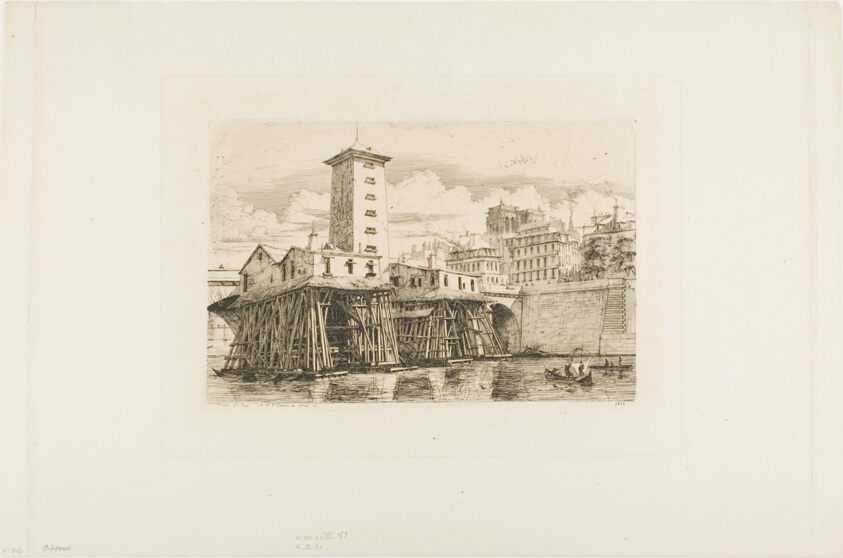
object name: Print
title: La Pompe Notre Dame, Paris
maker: Charles Meryon (French, 1821-1868)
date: 1852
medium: Etching on cream laid paper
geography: France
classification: etching; print; prints and drawing